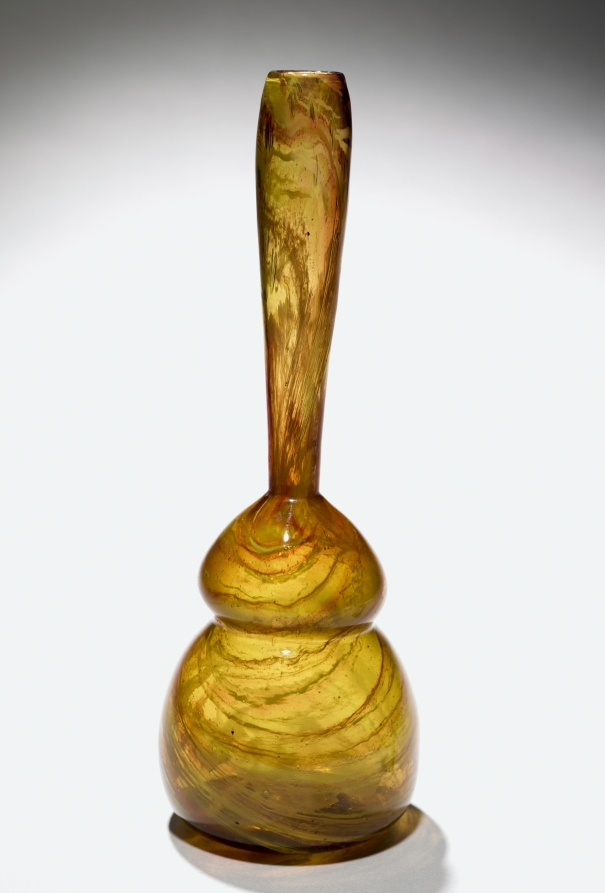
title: Vase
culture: England, 19th century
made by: James Couper and Sons (Scottish)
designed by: Christopher Dresser (British, 1834–1904)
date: c. 1895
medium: clutha glass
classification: Glass